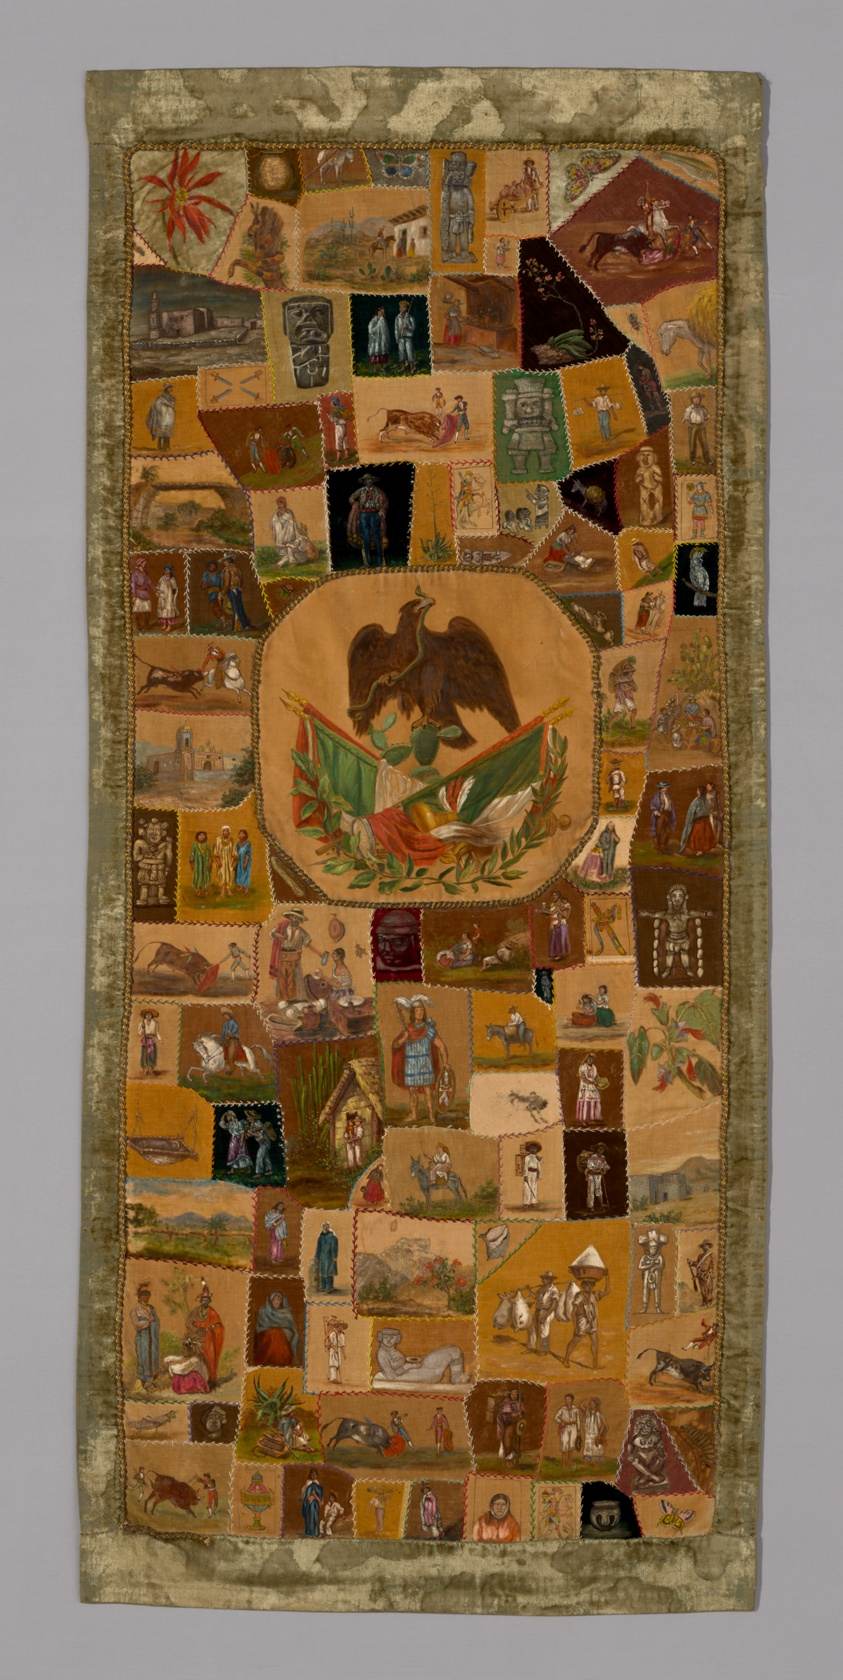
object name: Textile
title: Hanging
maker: Mexico and/or United States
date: 1876/1900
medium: Pieced, painted and embroidered quilt; silk and cotton velvet weaves; silk embroidery threads; metal, silk and cotton cord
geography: United States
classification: textile; weaving; needlework (visual works); weaving - velvet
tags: coat of arms, animals, insects, birds, flowers, people, royalty